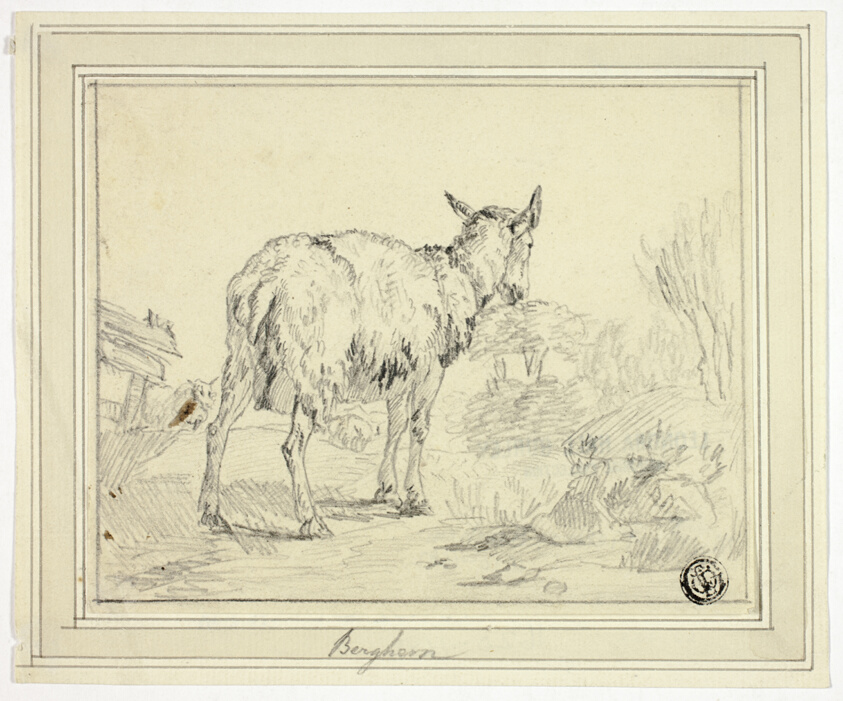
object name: Drawing and Watercolor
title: Goat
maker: Attributed Nicolaes Pietersz. Berchem; Dutch, 1620-1683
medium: Graphite on ivory wove paper, tipped onto ivory laid paper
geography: Holland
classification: graphite; drawings (visual works); prints and drawing